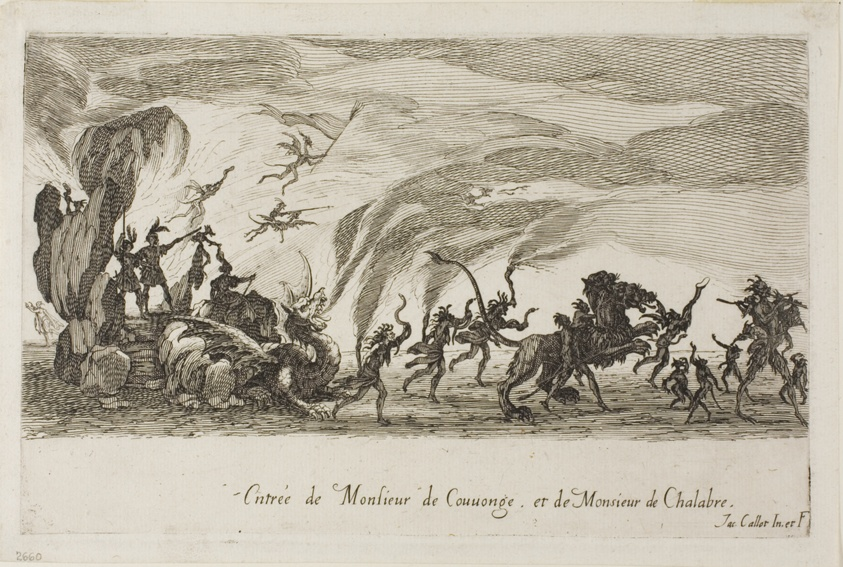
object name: Print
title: Entry of M. de Couvonage and M. de Chalabre, from The Combat at the Barrier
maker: Jacques Callot (French, 1592-1635)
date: 1627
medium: Etching in black on ivory laid paper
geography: France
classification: etching; print; prints and drawing